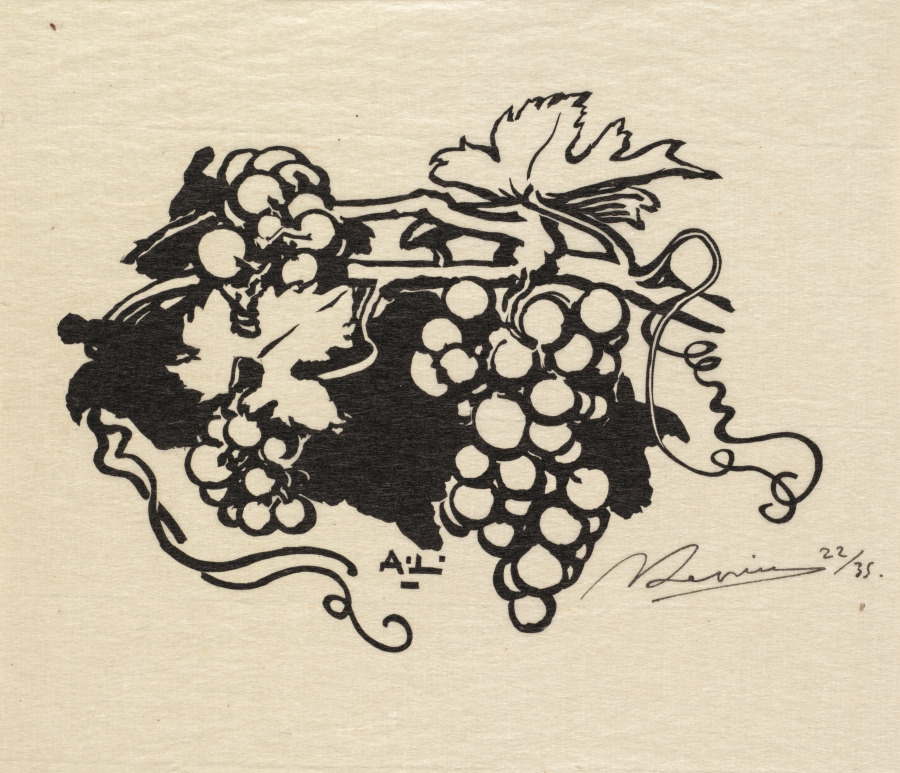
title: Fontainebleau Forest: Tailpiece, Grapes (La Forêt de Fontainebleau: Cul-de-lampe)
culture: France, 19th century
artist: Auguste Louis Lepère (French, 1849–1918)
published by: A. Desmoulins, Published in Revue Illustrée, 1887–90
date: 1890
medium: wood engraving from bound volume of 34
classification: Bound Volume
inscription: On block, lower center: A.L.; below image, lower right, in black ink: ALepère 22/35; on window mat, lower right, in graphite: Cul-de-lampe